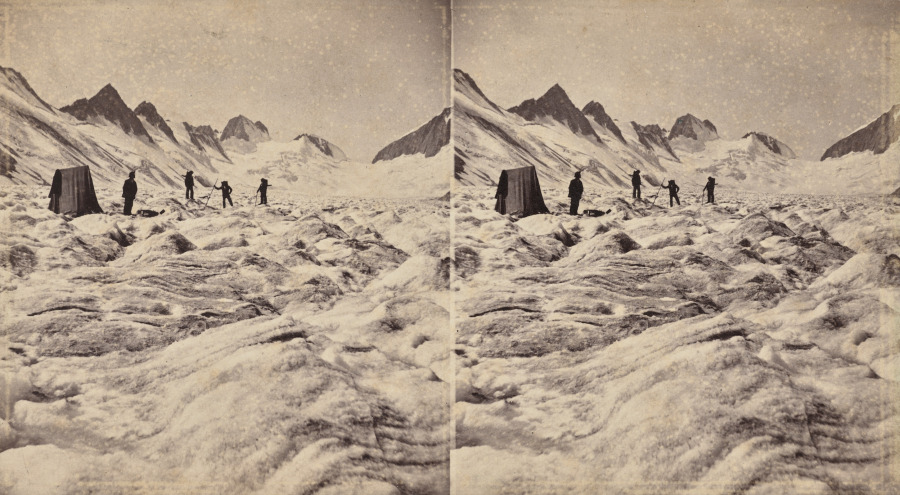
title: No. 1198 Glacier d'Oberaar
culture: France, 19th century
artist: Adolphe Braun (French, 1812–1877)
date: c. 1865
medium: albumen print, stereo card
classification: Photograph